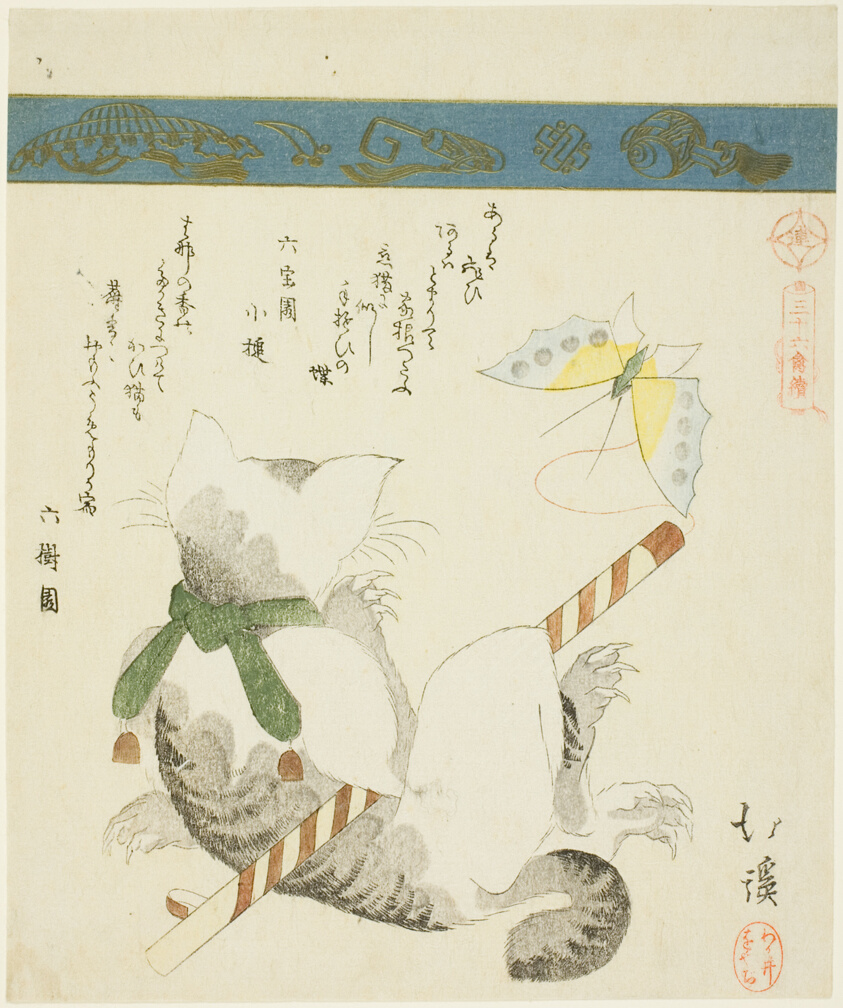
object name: Print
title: Cat Playing with a Toy Butterfly, from the series "Thirty-six Pictures of Birds (Sanjuroku kinzoku)"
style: Japanese (culture or style)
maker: Totoya Hokkei (Japanese, 1780–1850)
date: 1828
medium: Color woodblock print with metallic pigments; surimono shikishiban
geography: Japan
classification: woodblock print; print; asian art